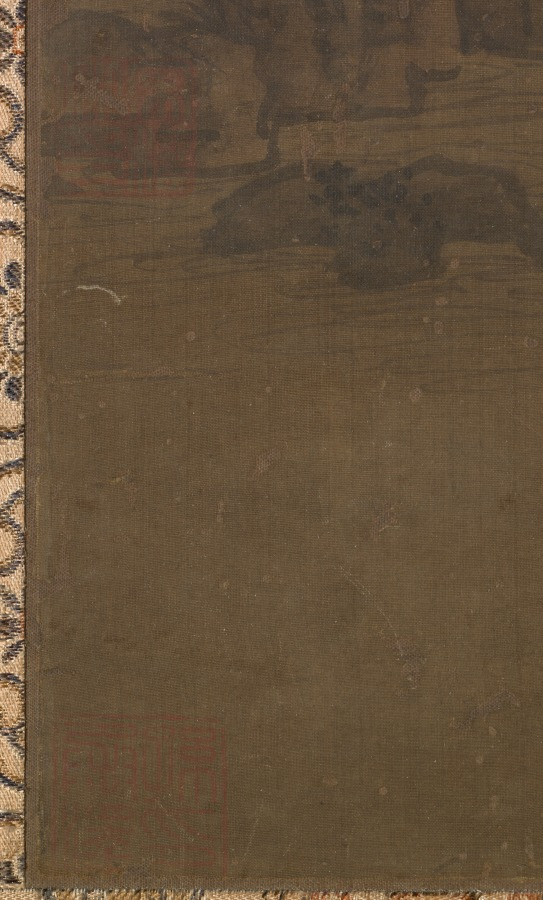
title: Landscape in the Style of Juran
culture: China, Ming dynasty (1368–1644)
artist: attributed to Liu Du (Chinese, active c. 1628-after 1653)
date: 1368–1644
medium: Hanging scroll mounted as a panel; ink and slight color on silk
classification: Painting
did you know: There is a tiny apocryphal signature under the overhanging rocks on the lower left side.